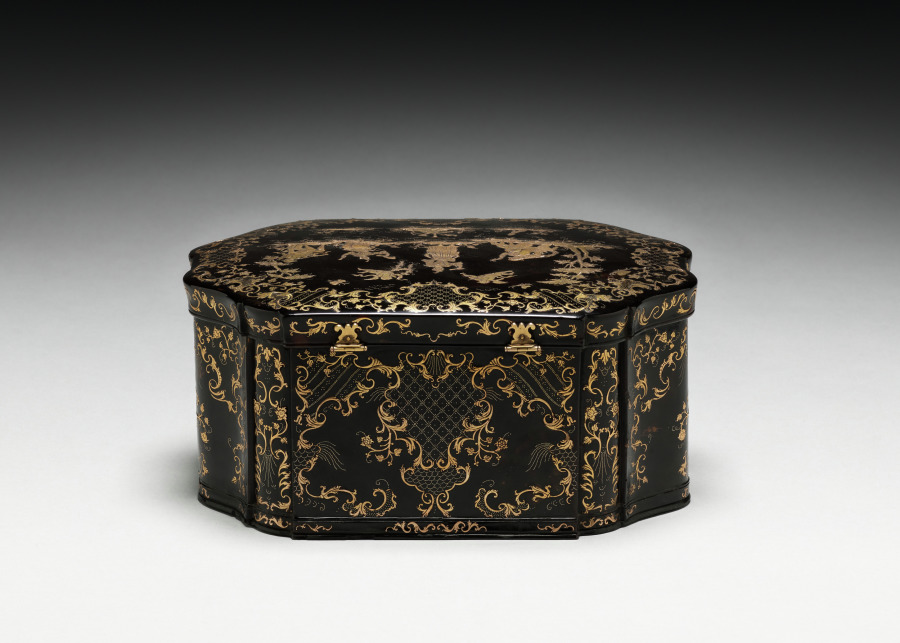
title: Box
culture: Italy, Naples (?), 18th century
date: c. 1750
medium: tortoise shell and gold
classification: Miscellaneous